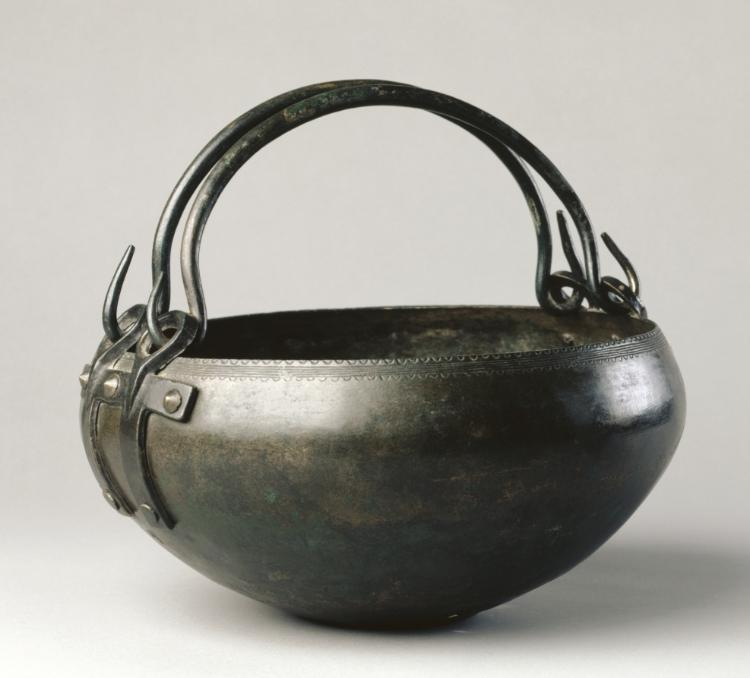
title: Ritual Cauldron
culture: Hungary, Bronze Age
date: c. 1000–900 BCE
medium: bronze, hammered, cast and wrought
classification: Metalwork